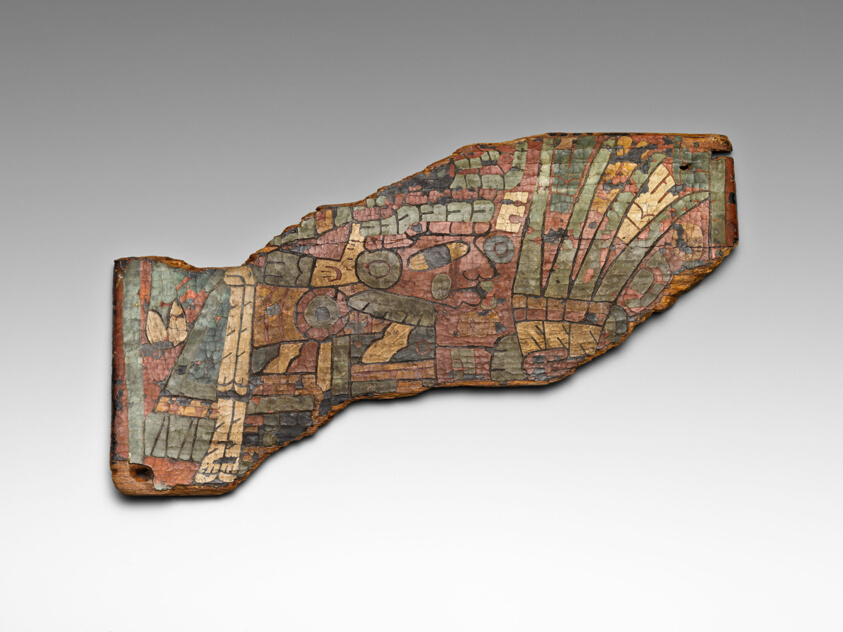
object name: Decorative Arts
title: Box Fragment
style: teotihuacán, mesoamerican, Pre-Columbian, americas, Arts of the Americas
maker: Teotihuacan (Teotihuacan, Mexico)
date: 300–750 CE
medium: Wood, stucco, and pigment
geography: Valley of Mexico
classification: wood; american decorative arts; container; decorative arts; art of the americas